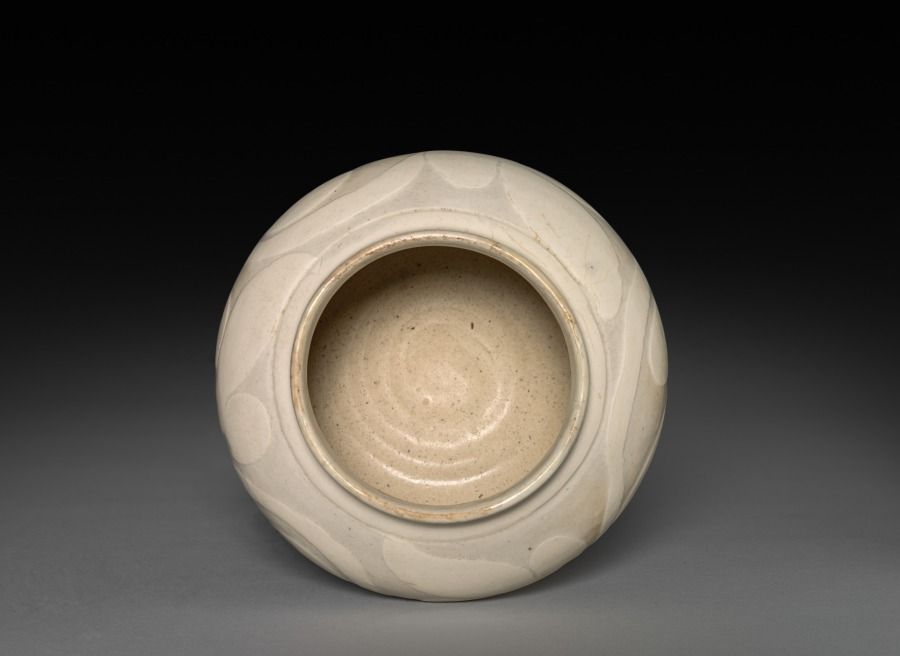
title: Jar: Cizhou ware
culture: China, Northern Song dynasty (960-1127) - Jin dynasty (1115-1234)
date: 12th-13th Century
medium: glazed light gray stoneware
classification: Ceramic